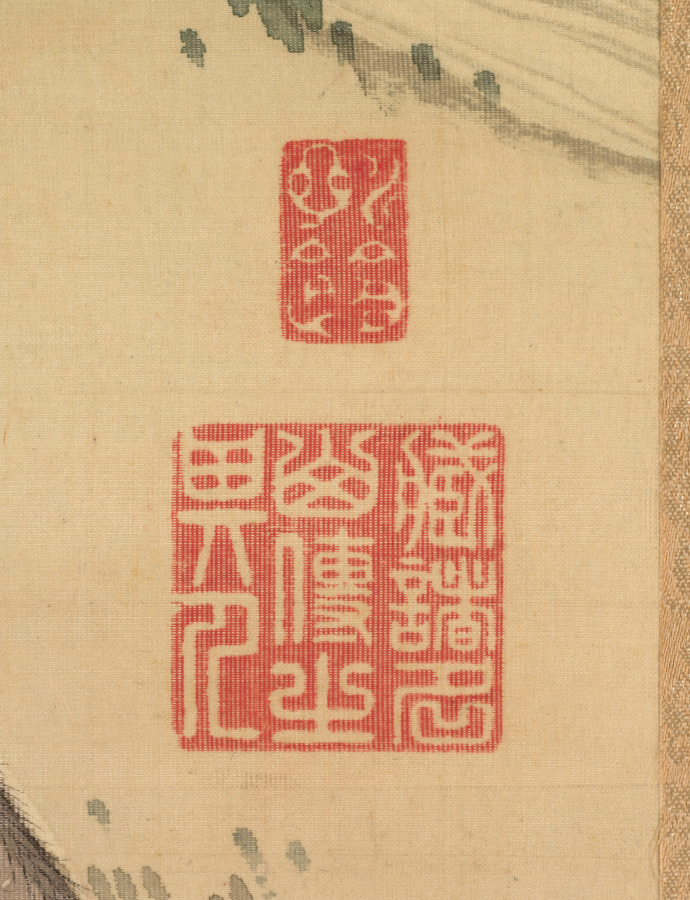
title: Symbols of Longevity: Deer under Peach and Pine (Peach) (left)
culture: Japan, Edo period (1615–1868)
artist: Toda Tadanaka (Japanese, 1761–1823)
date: 1801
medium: Pair of hanging scrolls; ink and color on silk (ivory roller ends)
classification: Painting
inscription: Lefthand painting signed: Kano no tori natsubi Fuji Gon'ei utsusu (Painted on a summer day in 1801 by Fuji Gon'ei) Lefthand painting sealed beneath signature: square red seal with patterned border above; Fujiwara, square red seal below; Tadanaka yajirushi Lefthand painting sealed lower left: rectilinear red seal unread